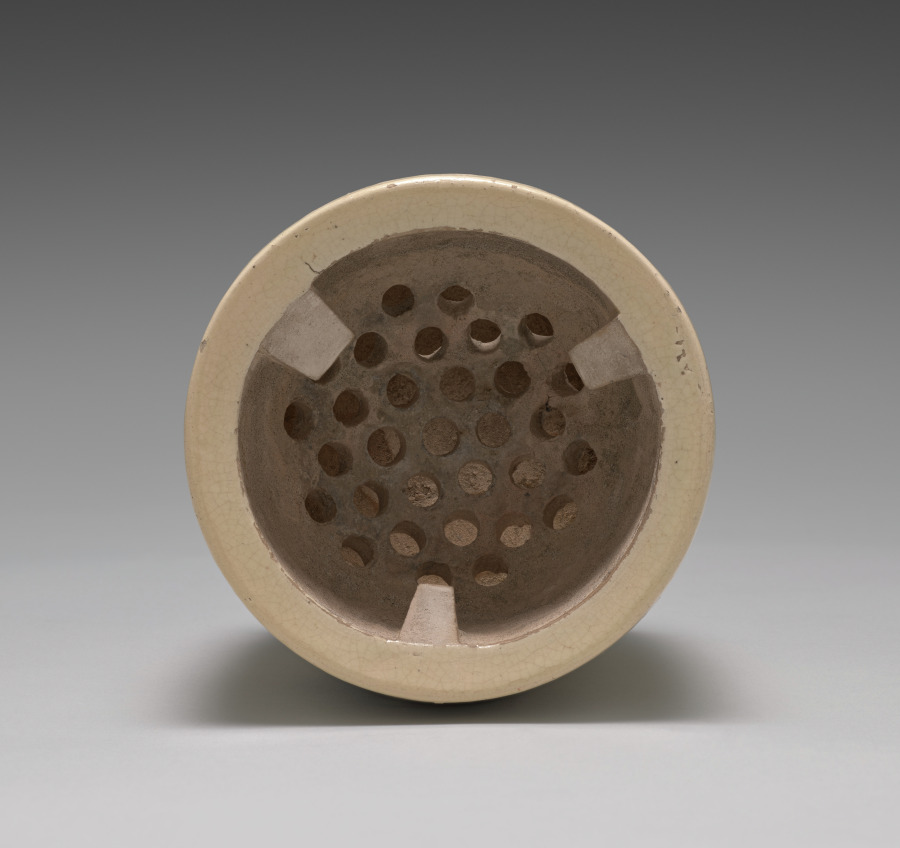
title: Brazier with Coins Motif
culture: Japan, Meiji period (1868–1912)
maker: Seifū Yohei III (Japanese, 1851–1914)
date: 1893–1914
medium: Stoneware with underglaze iron oxide designs and crackling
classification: Ceramic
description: Tall pottery braziers called ryōro are often used to heat the water for the tea served at sencha gatherings. This one sits on three sturdy legs, one of which bears the artist’s seal on its face. A horizontal rectilinear opening above this leg allows air to circulate into the lower part of the brazier. The top part is outfitted with three prongs onto which the kettle can be lowered; below them is a basin, perforated with circular holes, that holds the charcoal fuel. The brazier is decorated under the crackled transparent glaze with a design of old coins in iron oxide. The motif is cleverly chosen, for most older coins are round with a central hole, often square, which echoes the cylindrical form of the brazier with its rectilinear “wind gate,” or fūmon.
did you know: One coin is painted with the Japanese god of wealth, Daikokuten, standing upon two bales of rice.